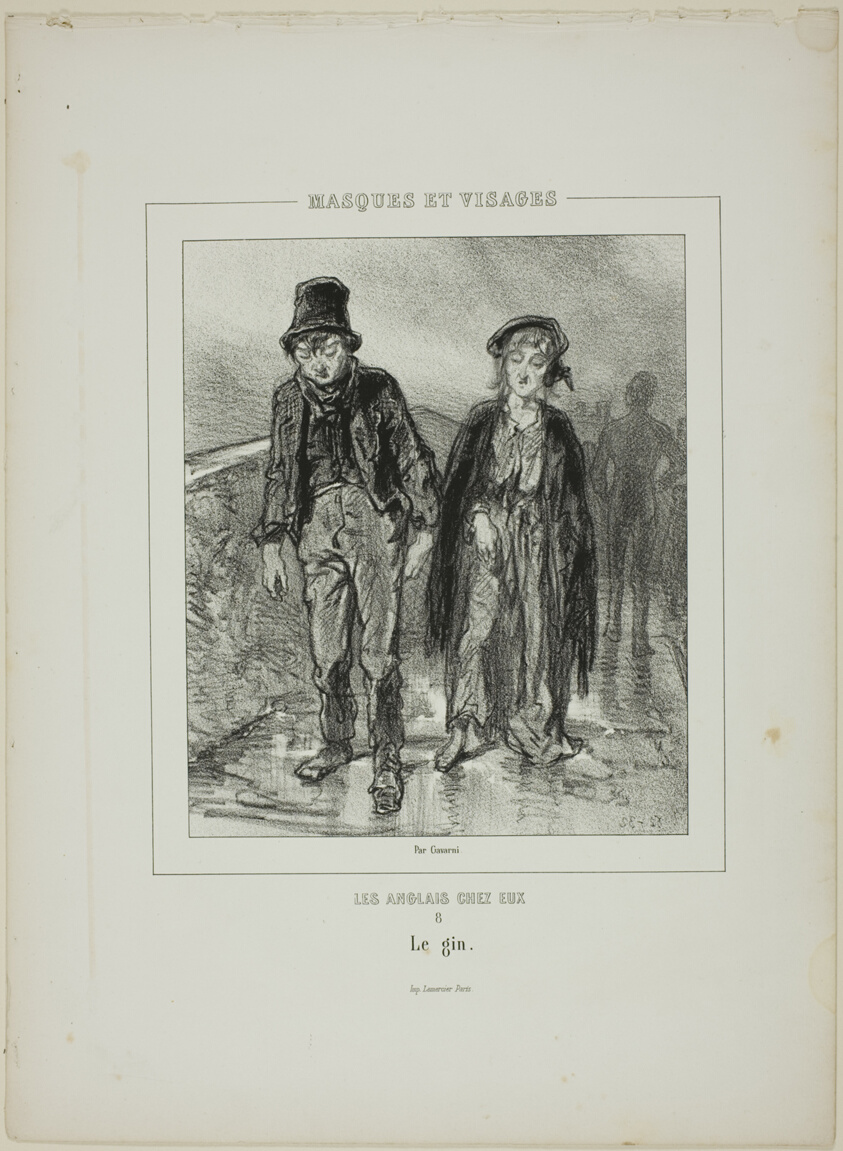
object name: Print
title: Les anglais chez eux: Le gin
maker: Paul Gavarni (French, 1804-1866)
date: 1853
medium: Lithograph in black on cream wove paper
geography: France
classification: lithograph; print; prints and drawing